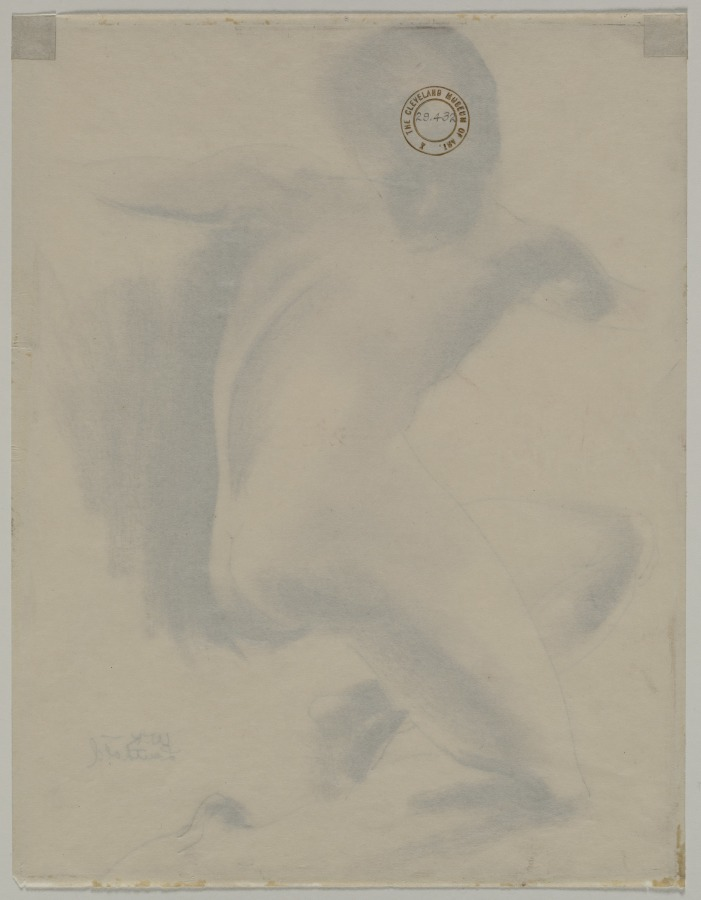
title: Nude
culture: America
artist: William K. Leuthold (American)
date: c. 1929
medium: pencil and brown chalk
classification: Drawing